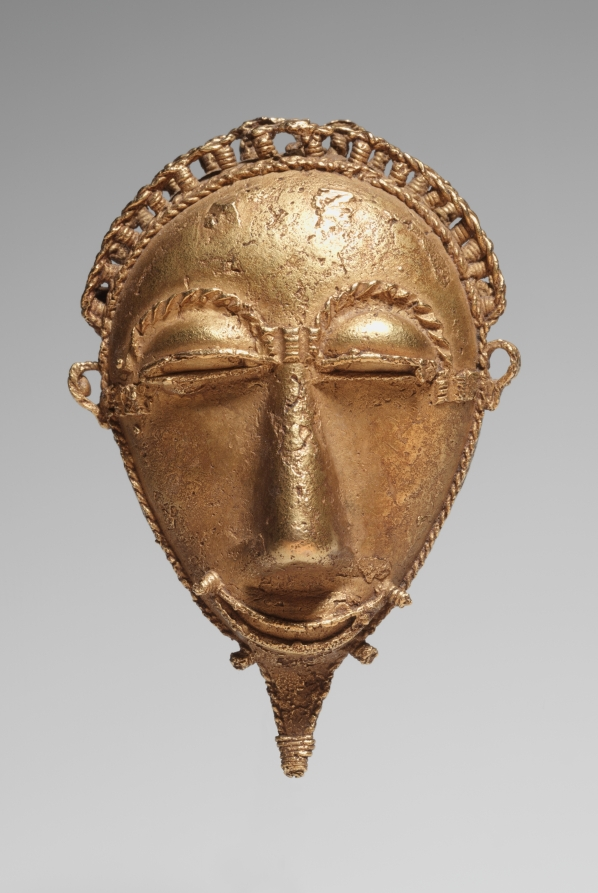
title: Pendant: Face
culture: Africa, West Africa, Côte d'Ivoire, possibly Baule-style goldsmith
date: 1900s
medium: Gold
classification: Jewelry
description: Cast using the lost-wax method, gold objects are the only Baule art forms associated with ancestral spirits. Usually stored in suitcases or pots, a collection of gold adornments (aja) are displayed on important occasions such as funerals. They are laid out around the corpse before burial as a sign of respect and their family's wealth. Faces such as this pendant are said to be idealized portraits of friends or lovers. This depiction of a man has a beard and elaborately styled hair.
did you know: The raised texture seen on the forehead are remains of the gating technique used to introduce molten metal into the mold during lost-wax casting and indicate that the surface was not highly finished after casting.